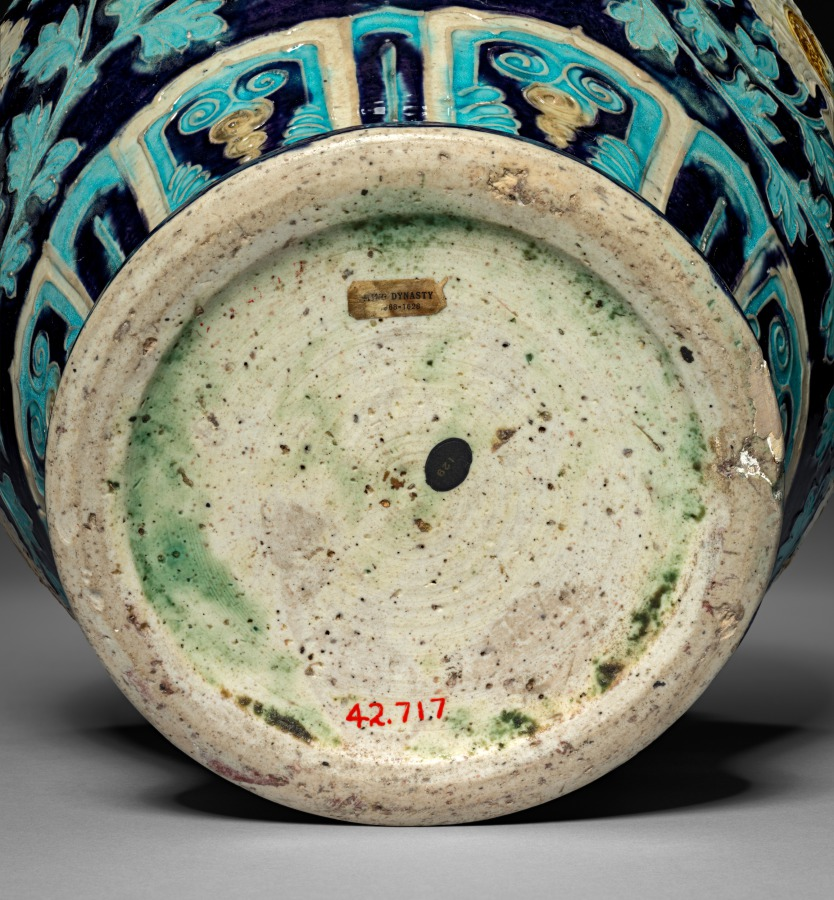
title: Jar with Chrysanthemum Decoration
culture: China, Ming dynasty (1368–1644)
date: 1368–1644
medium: porcelain, Fahua ware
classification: Ceramic